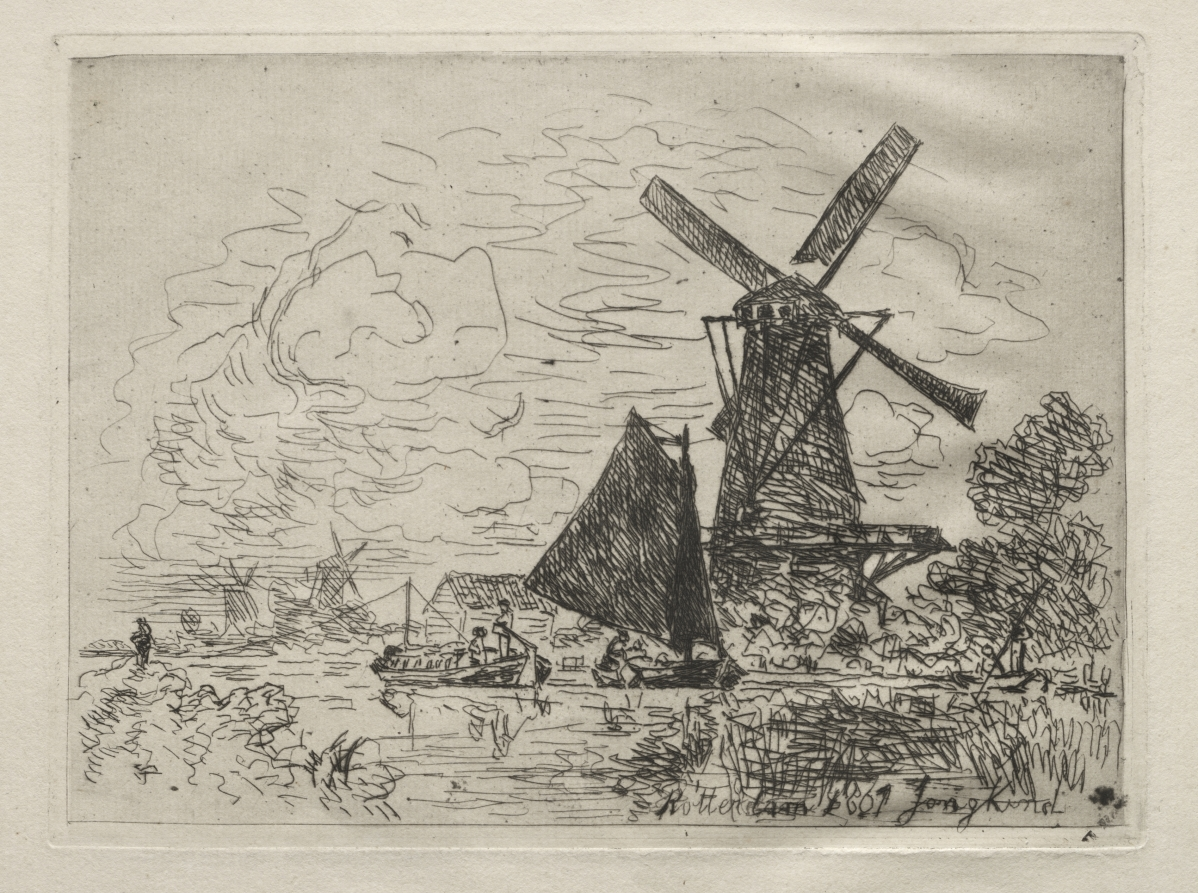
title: Windmills in Holland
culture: Netherlands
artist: Johan Barthold Jongkind (Dutch, 1819–1891)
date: 1867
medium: etching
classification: Print